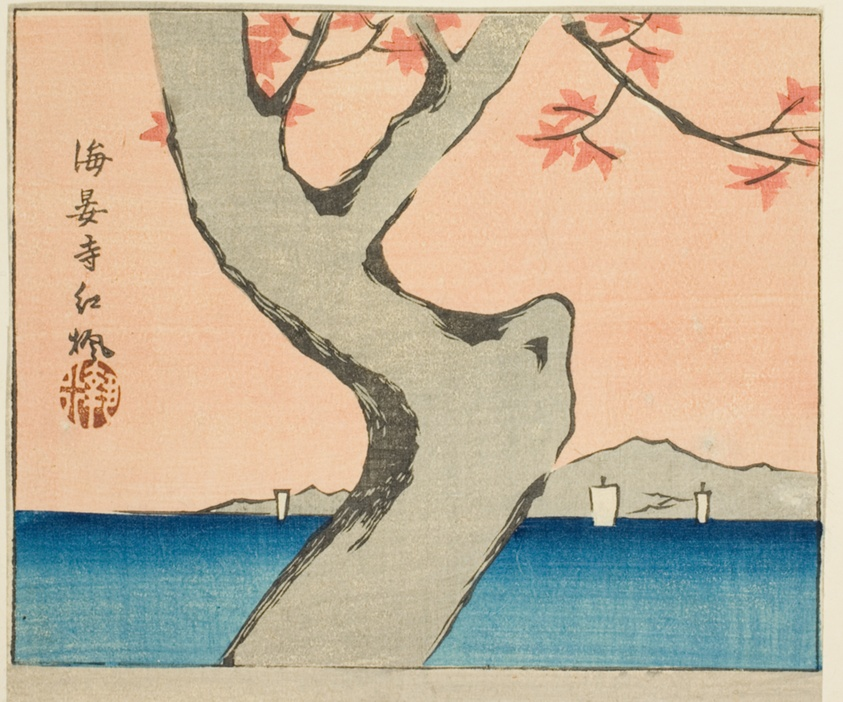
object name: Print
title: Maple Leaves at Kaian Temple (Kaianji benikaede), section of a sheet from the series "Cutout Pictures of Famous Places in Edo (Edo meisho harimaze zue)"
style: Japanese (culture or style)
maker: Utagawa Hiroshige 歌川 広重; Japanese, 1797-1858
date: 1857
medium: Color woodblock print; section of harimaze sheet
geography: Japan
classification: woodblock print; print; asian art